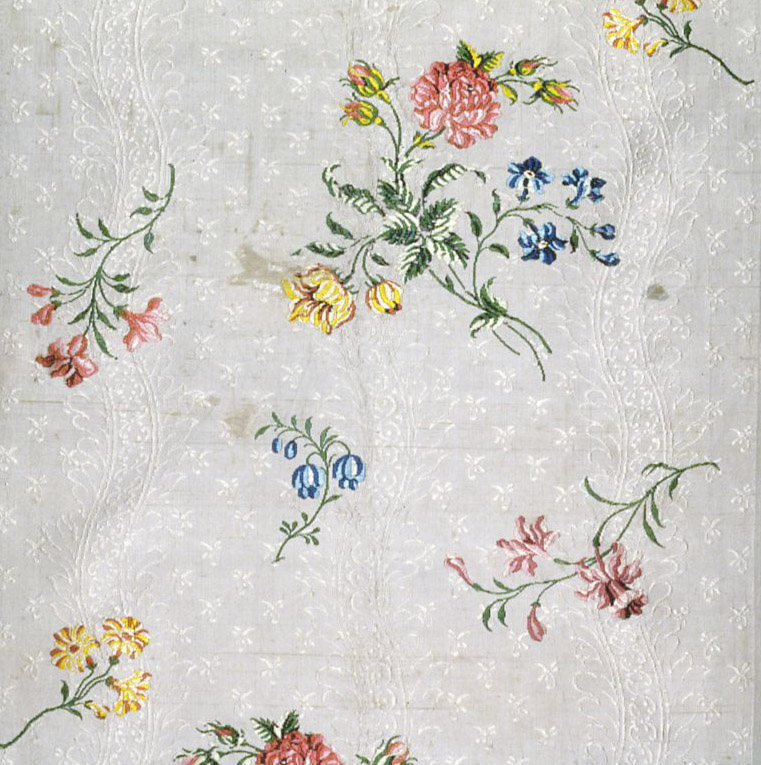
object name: Textile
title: Panel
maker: England, Spitalfields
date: c. 1747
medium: Silk, plain weave with supplementary brocading wefts and self-patterned by complementary ground weft floats; two panels joined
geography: England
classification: textile; weaving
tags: floral arrangements, garlands